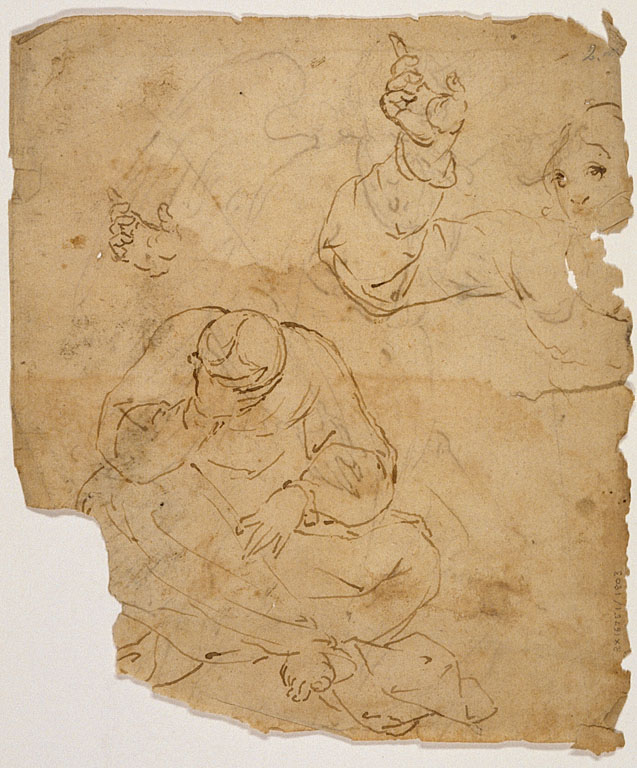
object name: Drawing and Watercolor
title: Annunciate Angel (recto); Sketches of Seated Figure, and Upper Portion and Right Hand of Annunciate Angel (verso)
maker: Genoese (Italian), or Spanish; Late 16th century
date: c. 1600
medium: Pen and brown ink (recto and verso) on ivory laid paper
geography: Genoa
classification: pen and ink drawings; drawings (visual works); prints and drawing